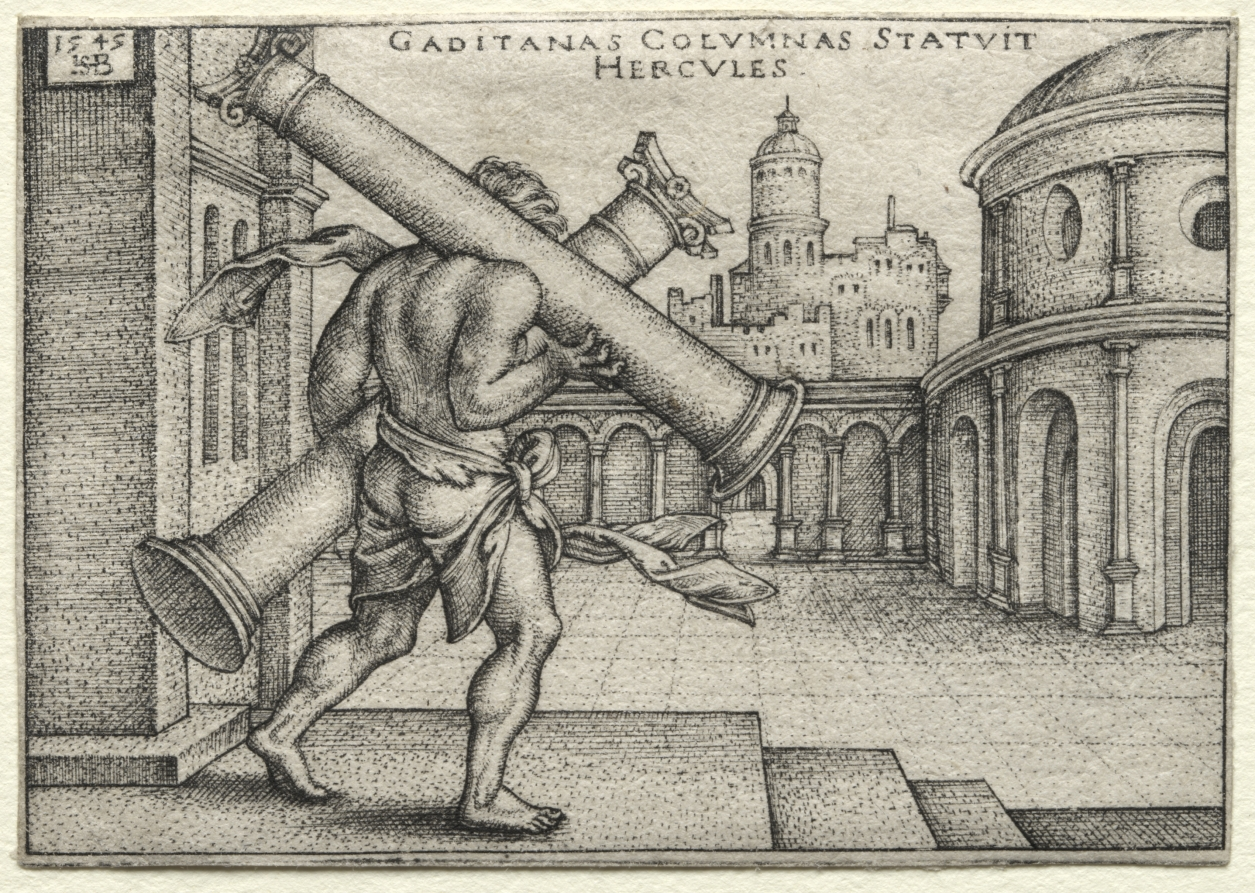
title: The Labors of Hercules: Hercules and the Columns of Gades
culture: Germany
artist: Hans Sebald Beham (German, 1500–1550)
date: 1545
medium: engraving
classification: Print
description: Beham was one of several German printmakers referred to today as the “Little Masters.” They established their artistic prowess by engraving remarkably small prints, appealing to collectors fascinated with miniature objects and curiosities. Here, Beham has packed 12 larger-than-life stories of the mighty Hercules into tiny prints. The series includes three of the 12 labors Hercules performed as penance for slaying his children in a fit of madness: Strangling the Nemean Lion, Killing the Lernean Hydra, and Dragging Cerberus from the Underworld. The other scenes depict tales from his life and the events preceding his death. The son of Jupiter and the mortal Alcmena, Hercules was both man and god. His saga of moral and physical trials made him one of the most popular classical heroes in Renaissance art.